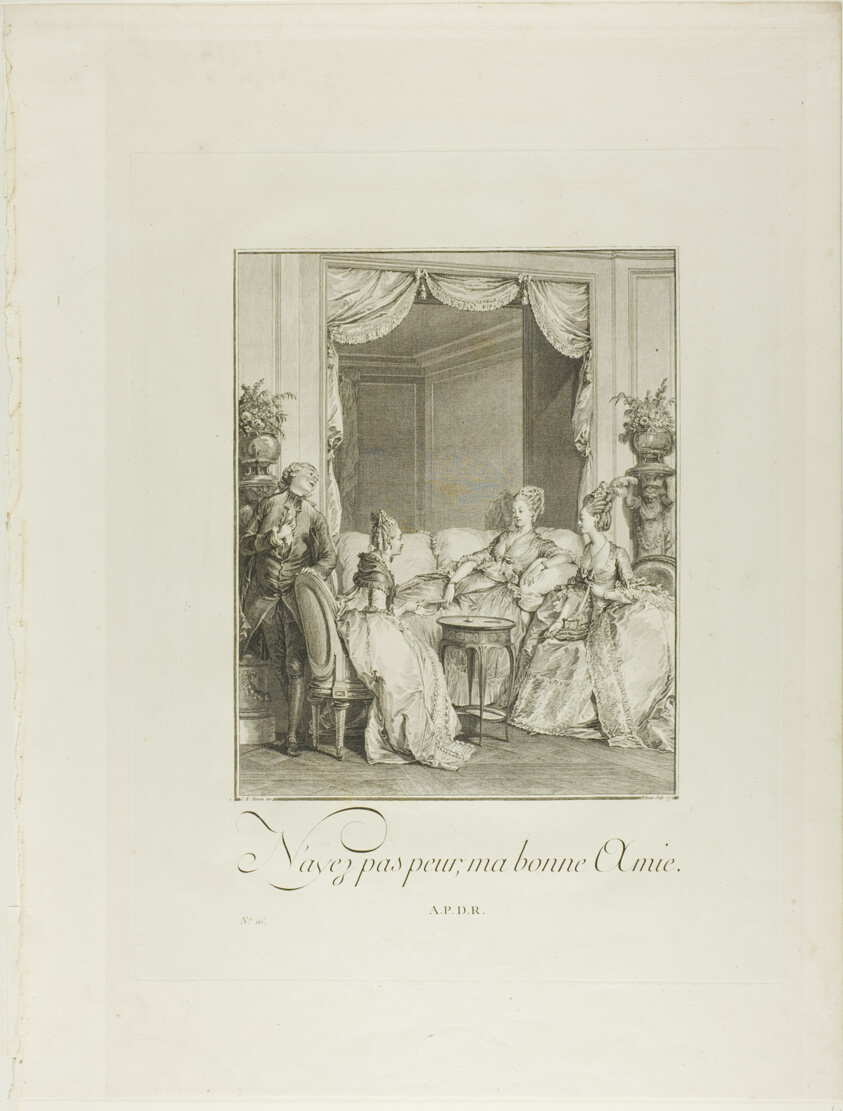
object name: Print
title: Don't Be Afraid, My Friend, from Monument du Costume Physique et Moral de la fin du Dix-huitième siècle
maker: Isidor-Stanislas Helman (French, 1743-1806 or 1809); after Jean Michel Moreau (French, 1741-1814); published by Laurent-François Prault (French 1712-1780)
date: 1776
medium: Engraving on paper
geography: France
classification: etching; print; prints and drawing